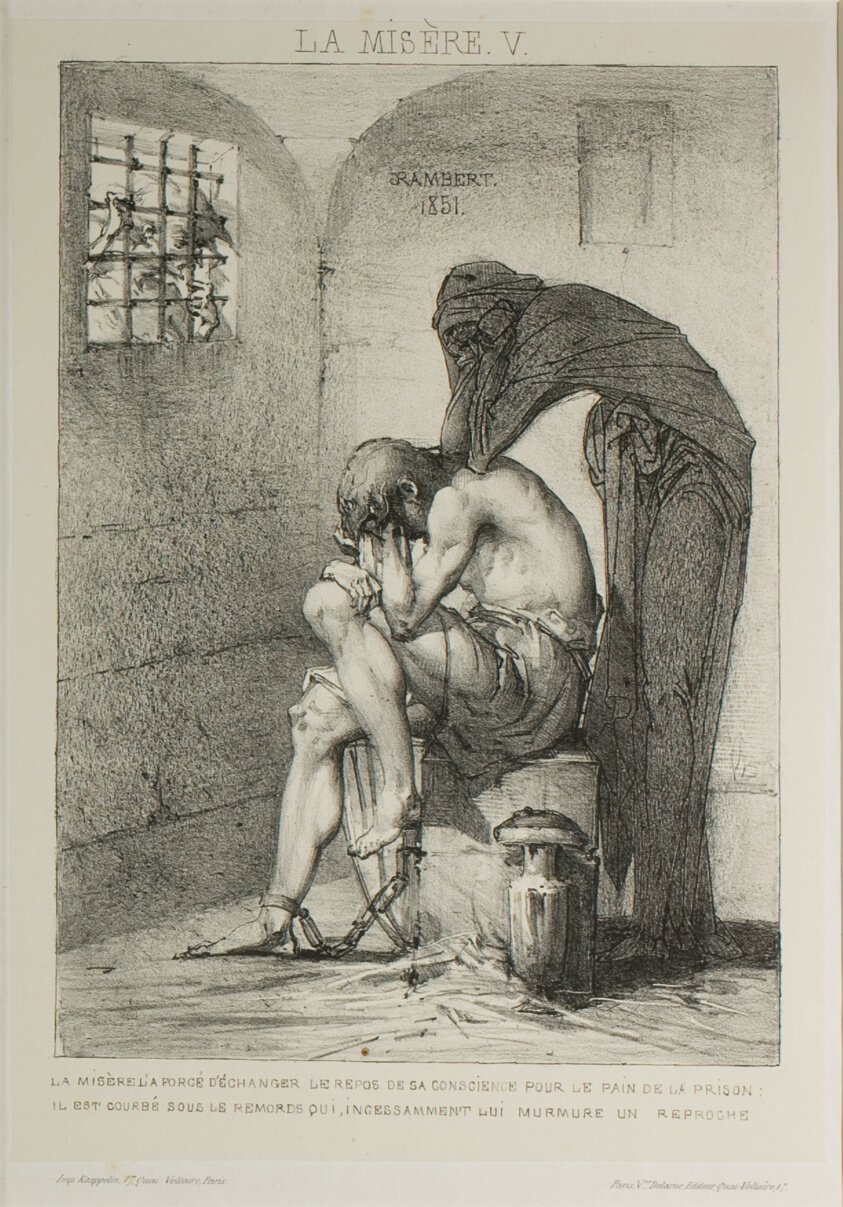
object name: Print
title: Plate Five from Misery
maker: Charles Rambert (French, active 1836–1867); printed by Kaeppelin; published by Victor Delarue (French, 19th century)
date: 1851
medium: Lithograph in black on cream China paper, laid down on ivory wove paper (chine collé)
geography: France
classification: lithograph; print; prints and drawing